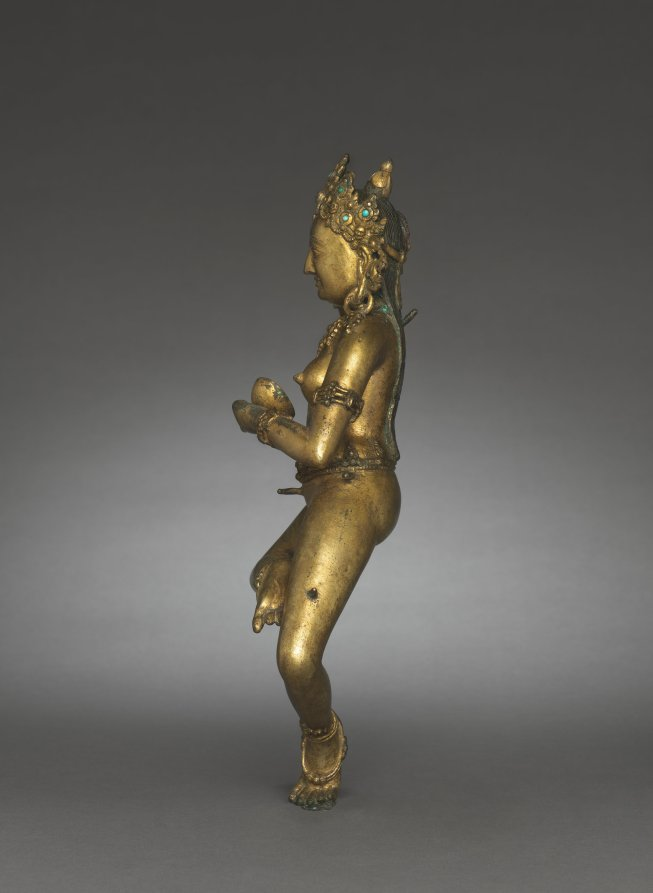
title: Vajravarahi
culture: Tibet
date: 1300s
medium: gilt bronze with turquoise inlay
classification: Sculpture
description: Vajravarahi is the tantric Buddhist counterpart to the Hindu mother goddess Varahi, identifiable by the boar head emerging above her right ear. She is a female enlightened being who emanated from the Buddhist Goddess of Perfect Wisdom. Enlightened beings transcend gender distinctions, and they can emanate as either male or female. The lithe figure dances while carrying a skull cup in her left hand. Raised up in her right hand is a ritual flaying knife with a handle in the shape of a halfvajra, used for skinning the metaphorical beast of uncontrolled passions. The pegs cast into her lower body were for holding a bone skirt.